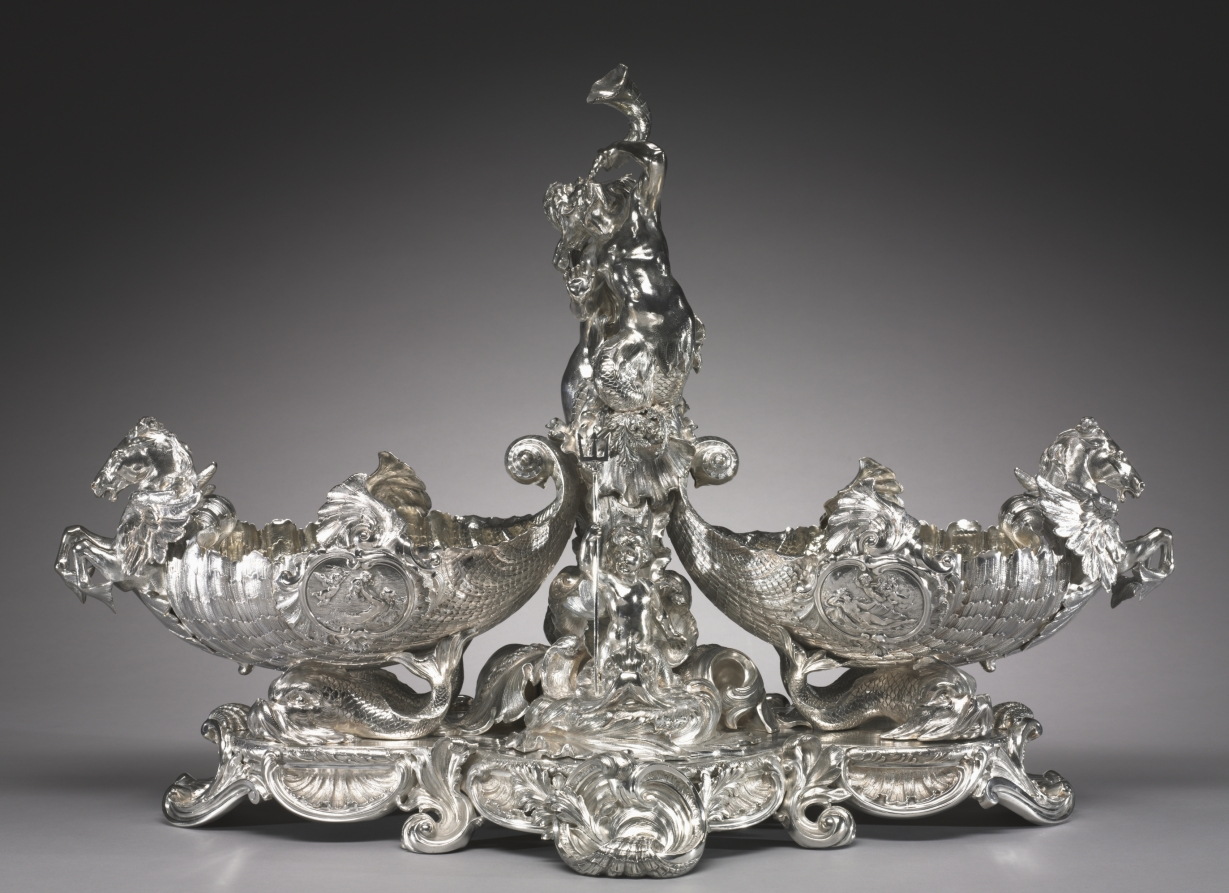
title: Centerpiece from the Nereid Service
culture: England, late 19th-early 20th century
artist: Goldsmith's & Silversmith's Company (British)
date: c. 1900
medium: silver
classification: Silver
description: Originally thought to have been made by the early 19th-century London silversmith Paul Storr because it had been marked with spurious Storr hallmarks, more recent scholarship has revealed that this service, representing the triumph of Great Britain on the high seas through the allegorical images of Grecian nymphs (nereids), was actually made to display at the 1900 world's fair in Paris. Such nationalistic fervor permeated design at the turn of the 20th century, especially in the years leading up to the First World War, when national pride was brought to its heels in Europe through a devastating conflict.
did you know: This centerpiece is actually the product of many hands since the Goldsmiths' and Silversmiths' Company operated as a cooperative of silversmiths who sold their work through the company.